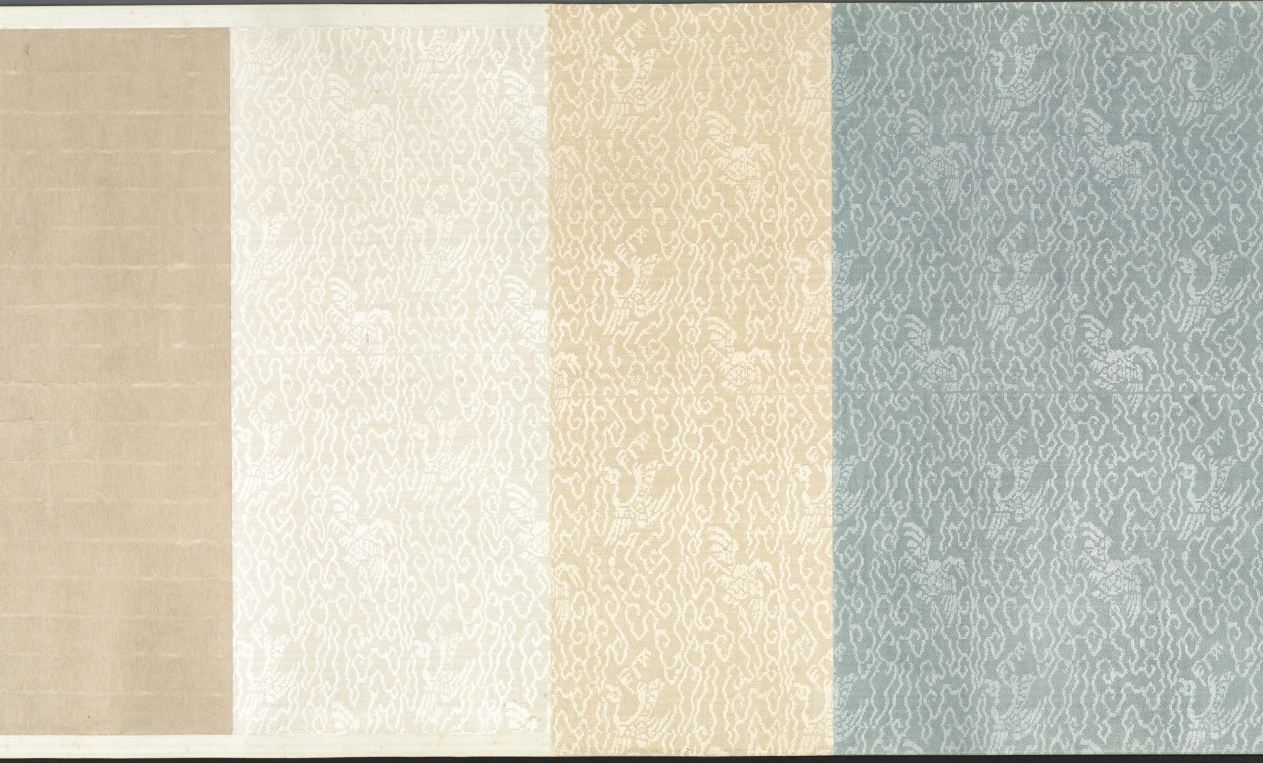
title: Buddha's Conversion of Five Bhiksu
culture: China, Yuan dynasty (1271–1368)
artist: Li Sheng (Chinese, active c. 1324–after 1375)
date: mid-1300s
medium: handscroll; ink on paper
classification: Painting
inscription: 紫篔生李升識 [印] 李氏子雲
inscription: 4 colophons and 12 additional seals: The "Heart" Sutra (Maha Prajnaparamita) text written by Wu Yuqing 吳餘慶 (active early 1400s); 2 seals of Xu Qianxue 徐乾學 (1631–1694); 3 colophons, one dated 1929 and two dated 1936, and 9 seals of Wu Hufan 吳湖帆 (1894–1968); 1 colophon, dated 1932, of Chen Dingshan; 1 seal unidentified.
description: This episode stems from the life of the historical Buddha, who, after his enlightenment, was initially hesitant about preaching his own doctrine. After much personal deliberation and prodding by deities, he finally relented. The first converts were the five guards who served him when he was still a prince. For Li Sheng, this is the pretext of the painting, which moves from the interaction of the bhiksu with the Buddha to a broader awareness of the vast surroundings of the scene.